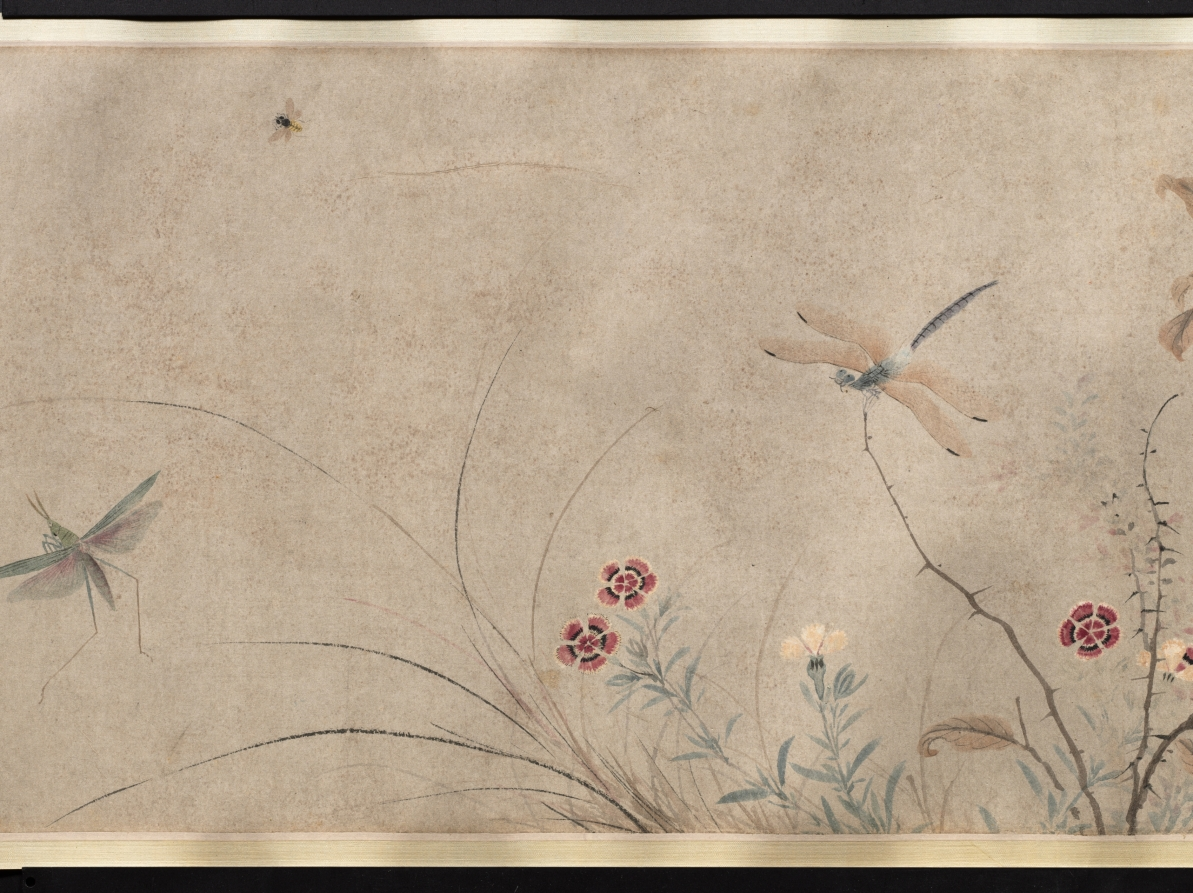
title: Insects and Flowers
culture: China, Qing dynasty (1644-1911) or Republican period (1912-49)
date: c. 1900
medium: Handscroll, ink and color on paper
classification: Painting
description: More than 26 feet long, this scroll presents insects, reptiles, and plants in delicate brushwork and pale colors, referring in style to earlier Southern Song dynasty (1127–1279) bird-and-flower paintings. Upon closer inspection, ants dismember a butterfly and reptiles wait to ambush their prey. An inscription at the end of the painting gives us an idea of its meaning: Attributed to the Qing dynasty scholar Zhang Xigeng (張錫庚, 1801–1861), the inscriber relates the work to an earlier painting by Qian Xuan (錢選, c. 1235–before 1307) and further suggests that the painting may allude to the relentlessness of natural selection. By drawing a parallel to tumultuous episodes in Chinese history, the writer might even hint at the domestic rebellions and the aggression of Western powers against China in his lifetime, particularly the Opium Wars (1839–60).